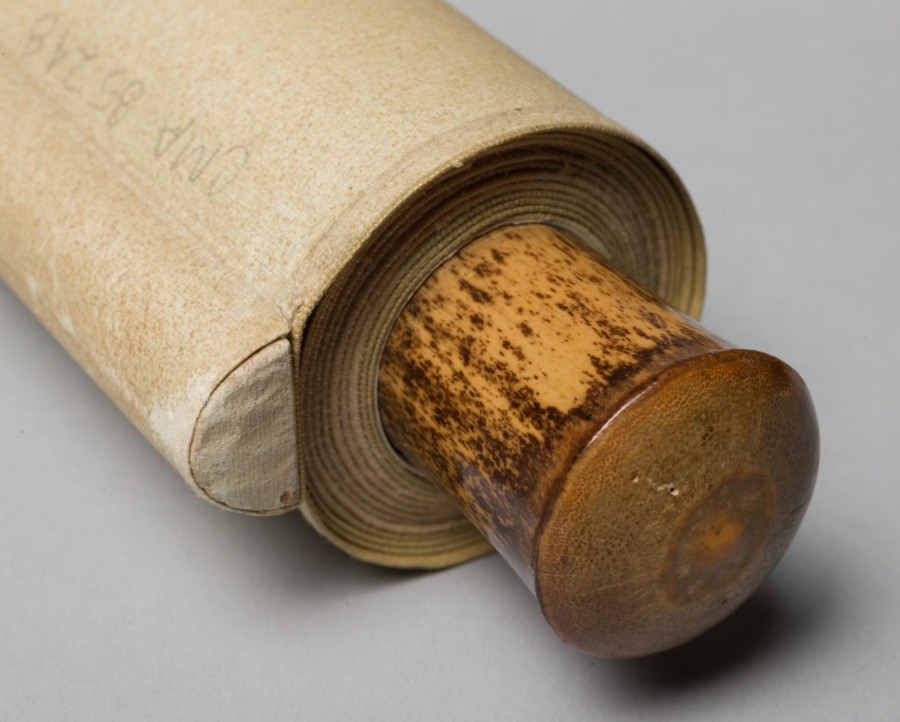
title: Imaginary Portrait of Shundai Dazai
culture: Japan, Edo period (1615–1868)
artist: Tani Bunchō (Japanese, 1763–1841)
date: late 1700s–1800s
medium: hanging scroll; ink and color on paper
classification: Painting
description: Shundai (1680–1747) was a noted Confucian scholar and writer. Brought up with a strongly Confucian family background, Bunchō’s veneration for Shundai is understandable. The inscription is by Nozawa Hikoroku, a scholar and poet contemporary with Bunchō.